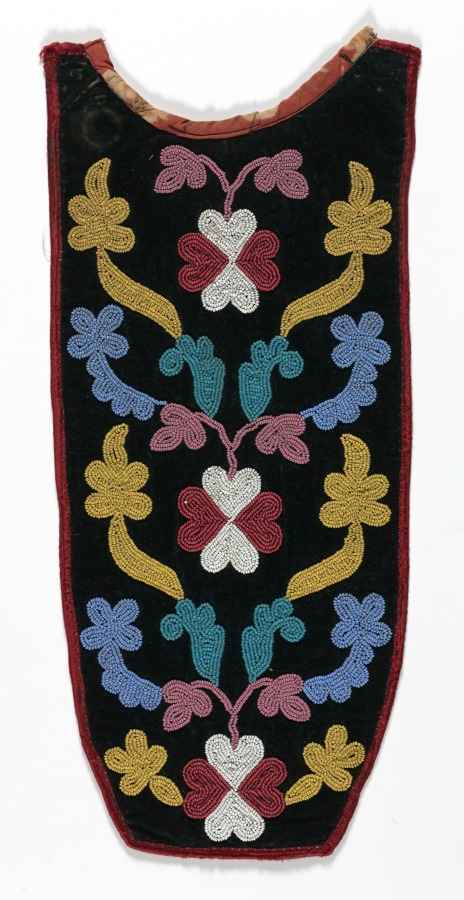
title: Placket and Cuffs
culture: Northeast Woodlands, Great Lakes Region, Anishinaabe (Ojibwe) or Nehiyawak (Cree) People?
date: late 1800s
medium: Velvet, cotton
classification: Garment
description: In the 1800s, native peoples began to use European fabrics to fashion fine formal garments; they favored sturdy cloth, such as velvet and wool broadcloth, which provided support for heavy decorative beadwork that was added by hand. Often the fabric was a dark color, providing dramatic contrast for the multicolored beads. Rather than encrusting the entire garment, beadwork was confined to cuffs, “epaulettes,” bib-like plackets and yokes, rectangular panels sewn to leggings, shirts, and dresses, and the like.